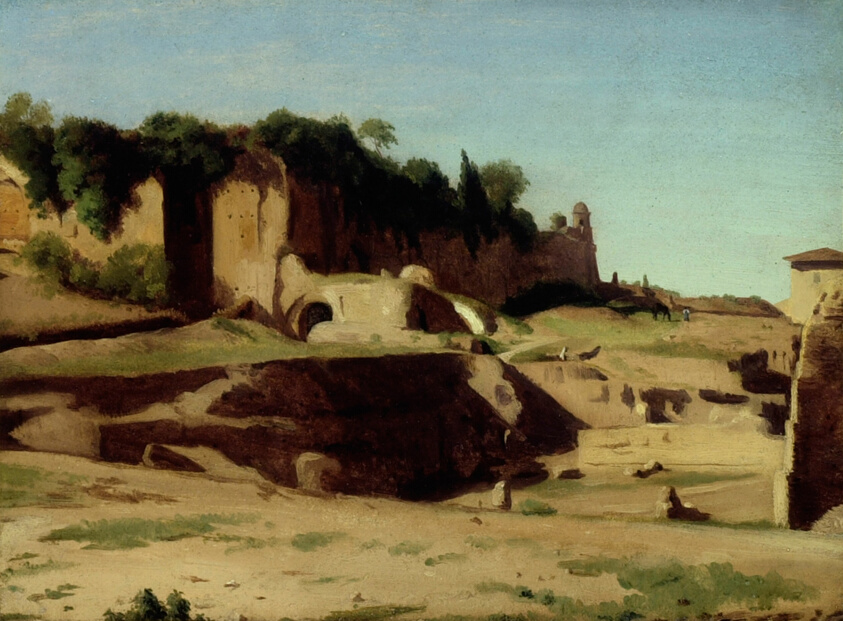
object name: Painting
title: The Imperial Palace on the Palatine, Rome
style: nineteenth century, 19th century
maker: Paul-Jean Flandrin (French, 1811–1902)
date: 1834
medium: Oil on card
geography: France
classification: oil on card; french; oil paintings (visual works); paint; painting; european painting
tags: ruins, buildings, building, walls, architecture, architecture, architechture, landscape, figures, figure, sky, trees, foliage, rocks, Italy, Roman, palace